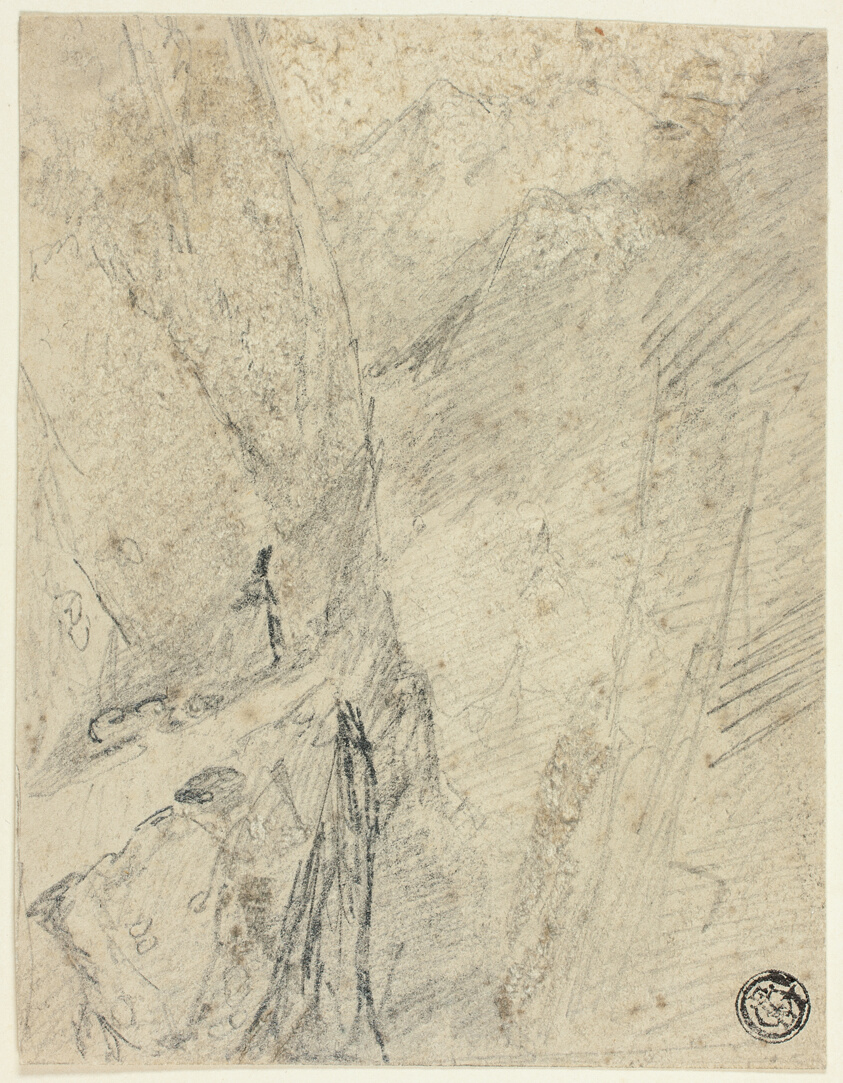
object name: Drawing and Watercolor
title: Mountain Gorge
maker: John Sell Cotman (English, 1782-1842)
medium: Graphite on cream wove paper, tipped onto cream wove paper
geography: England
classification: graphite; drawings (visual works); prints and drawing